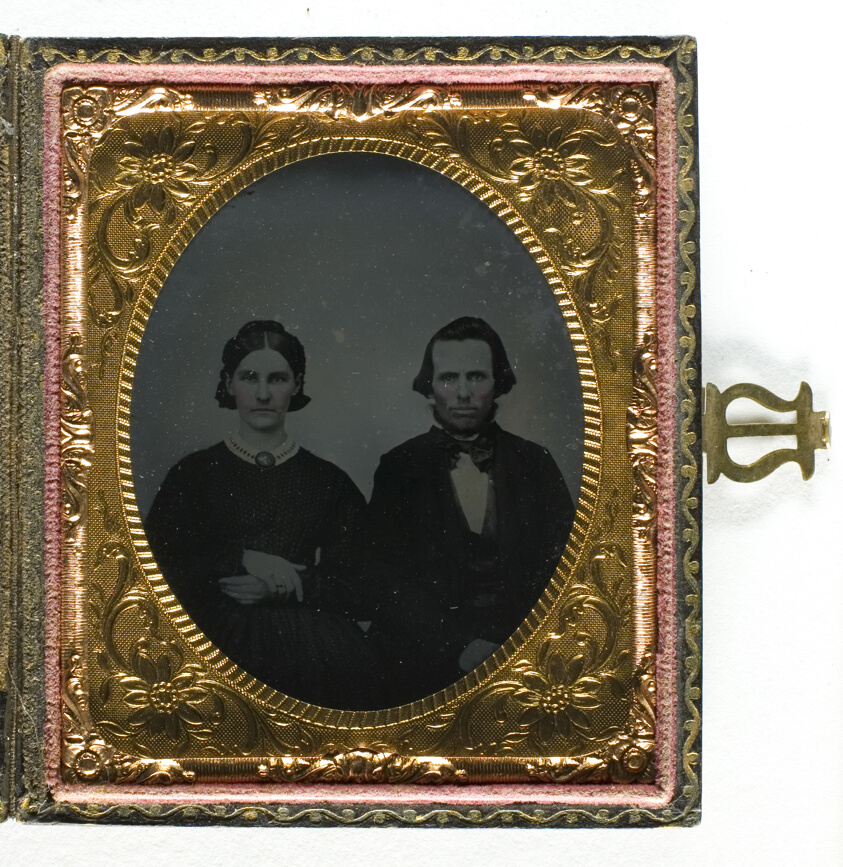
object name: Photograph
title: Untitled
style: 19th century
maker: Artist unknown; 19th century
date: 1839/99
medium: Ambrotype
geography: Unknown Place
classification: daguerreotype; photographic process; photography; photograph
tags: portraits, portraits: male subject, photography, portraits: female subject, portraits: multiple subjects